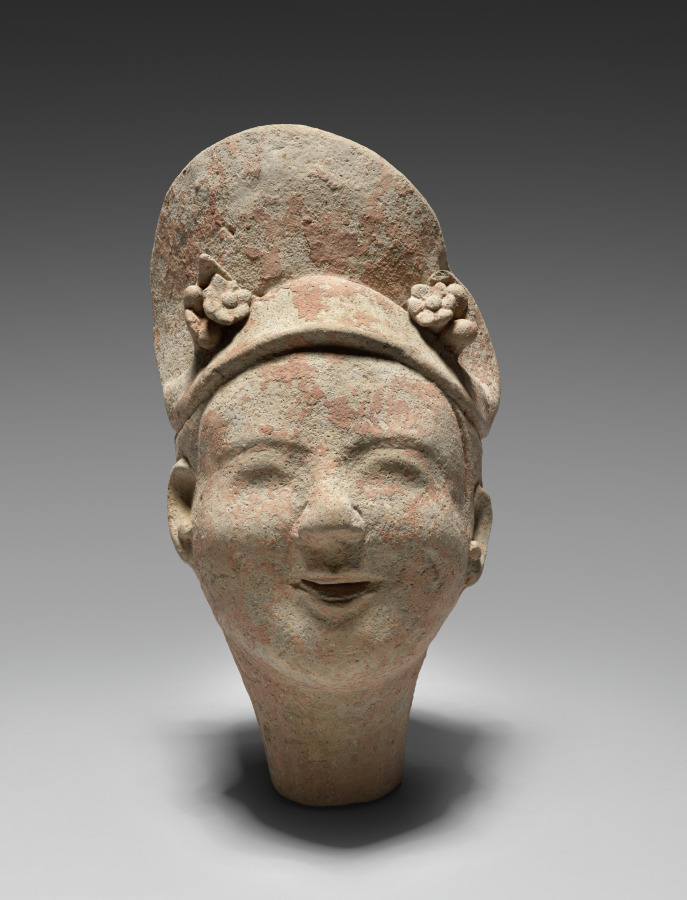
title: Female Figure of a Court Entertainer Dancing (Head)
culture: China, Sichuan province, Eastern Han dynasty (25–220 CE)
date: 100s CE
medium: Pottery with traces of color pigment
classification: Ceramic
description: During the Han era, tombs of the elite were provided with sculpted renditions of their earthly entourage, such as guardians or musicians, to signify their status in the afterlife. The female dancer with elaborate hairdo held by flower ornaments raises one arm holding her wide sleeve with one hand, while the other lifts her robe to reveal what appears to be a drum underneath her garment, her face smiling, all in a gesture of an entertainer.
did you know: The dancer lifts her robe to reveal what appears to be a drum underneath her garment.